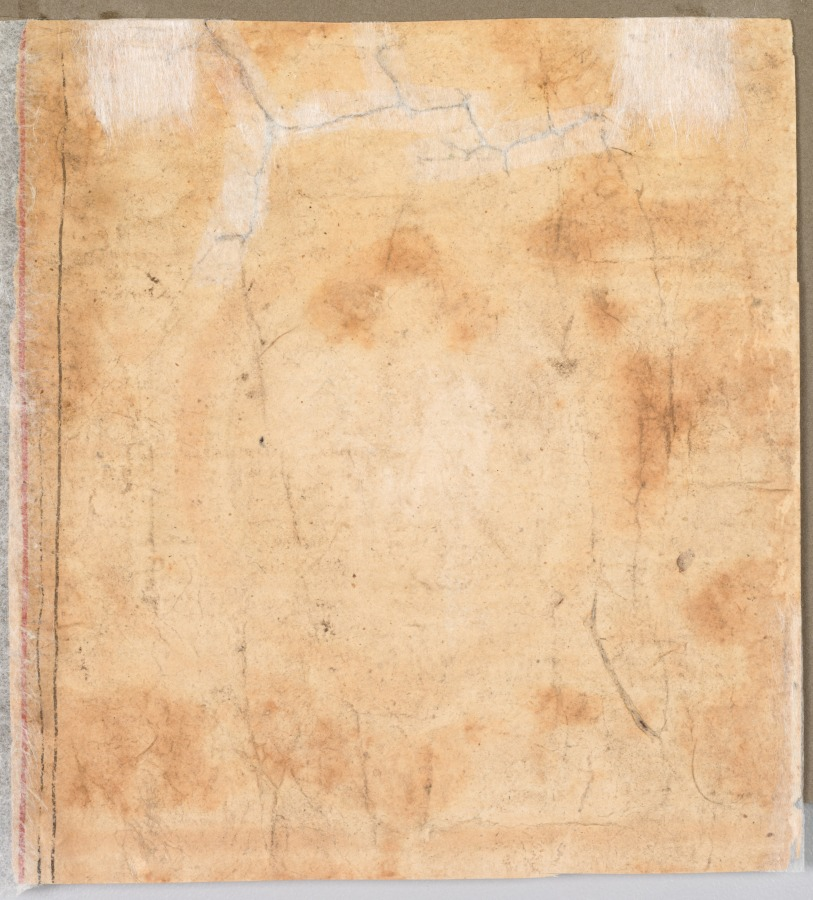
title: Votive initiation card (tsakali) with preaching Buddha Shakyamuni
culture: Western Tibet, Tholing Monastery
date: 1000s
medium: Gum tempera, ink, and gold on paper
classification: Painting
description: Buddhism was introduced to Tibet in the 7th century, but the persecution that followed in the 9th and 10th centuries destroyed all artifacts of the period. Consequently the earliest existing Buddhist art from Tibet dates to the 11th and 12th centuries, the so-called period of the Second Diffusion of Buddhism, yet few 11th- or 12th-century paintings survive. This miniature painting is one of these rare paintings. Not a manuscript illustration, it was conceived as a separate votive painting, a so-called tsa-kali. It was recovered from the Tholing Monastery, which was founded by Rinchensangpo (958-1055), the famous translator of Buddhist scriptures, who acted on the order of Yesheö, the king of Guge. Yesheö was also the father of "Lhatsun Nagaraja" (active 998-1026) whose name is inscribed on the museum's early Himalayan bronze statue of a Standing Buddha (1966.30)—one of the most important and beautiful Himalayan bronzes to survive. The museum's collection includes another important sculpture from the western Himalayas: the colorful wooden sculpture of a Seated Buddha (1986.6). The two sculptures date from the 11th century and provide a meaningful comparison with this painting, which replicates their style.